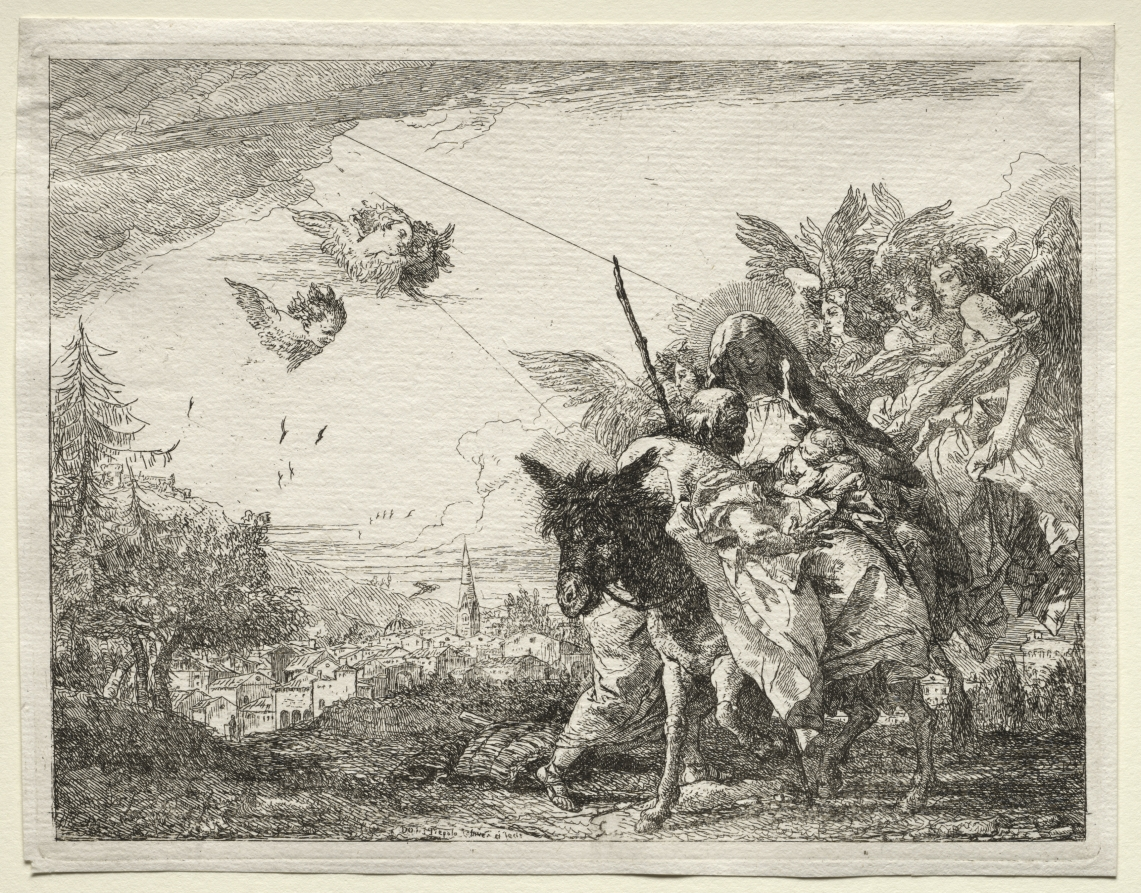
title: Flight into Egypt: Joseph Pausing to Gaze at the Infant Christ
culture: Italy, 18th century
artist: Giovanni Domenico Tiepolo (Italian, 1727–1804)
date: 1750–53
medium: etching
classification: Print